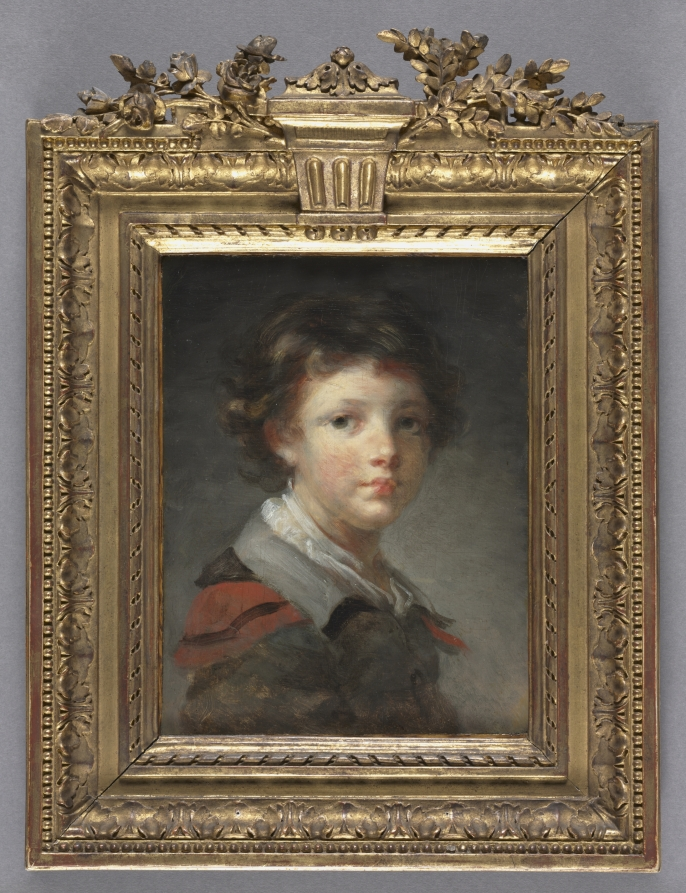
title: A Boy in a Red-lined Cloak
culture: France, 18th century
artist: Jean-Honoré Fragonard (French, 1732–1806)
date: 1780s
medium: oil on wood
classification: Painting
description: In the course of his long career, Fragonard produced more than 550 paintings. In this particular painting, the seventeenth-century costume, the brown palette, and his technique suggest that Fragonard is reflecting upon the work of Peter Paul Rubens and Rembrandt rather than his teacher François Boucher. While there is considerable evidence that the sitter is Alexander Evariste Fragonard, the artist's son, this identity has never been confirmed.